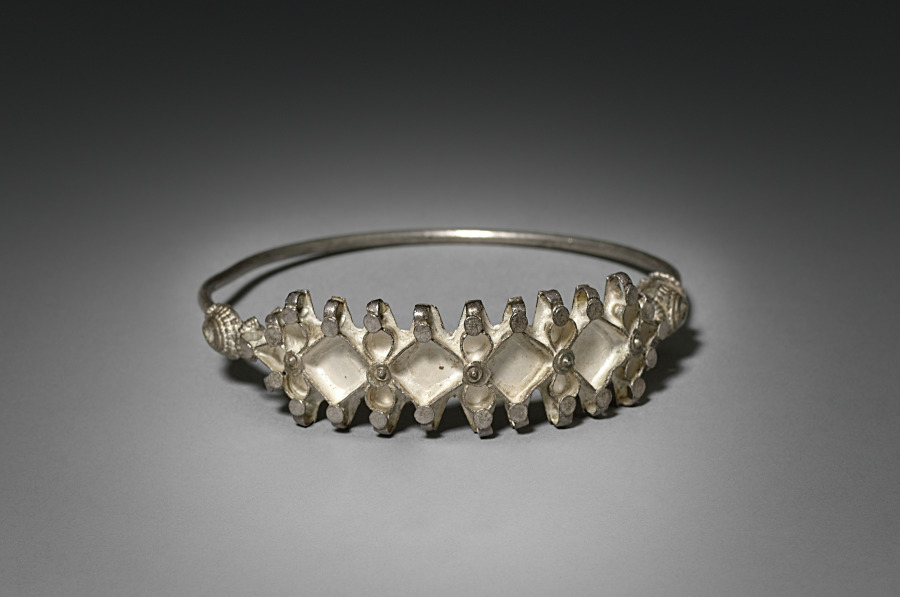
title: Nose Ring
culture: India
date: 20th Century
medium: silver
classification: Jewelry